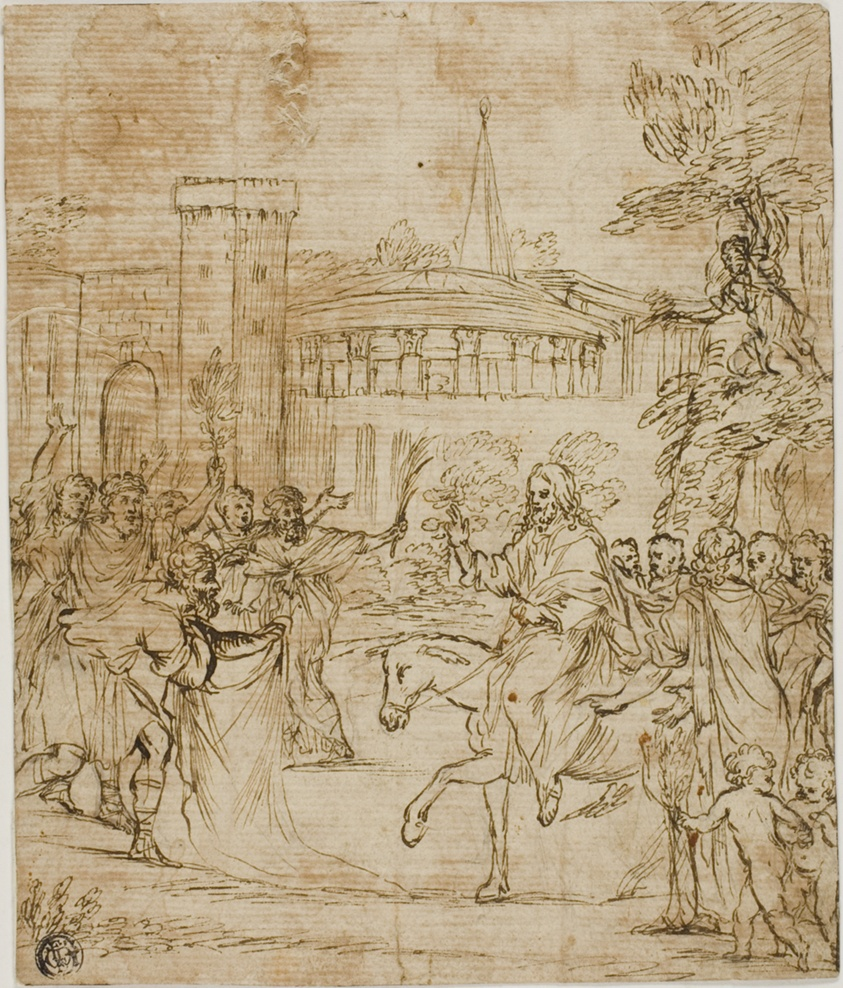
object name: Drawing and Watercolor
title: Christ's Entry Into Jerusalem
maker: Michel Corneille, the Younger; French, 1642–1708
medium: Pen and brown ink over graphite on cream laid paper, laid down on ivory laid paper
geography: France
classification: pen and ink drawings; drawings (visual works); prints and drawing